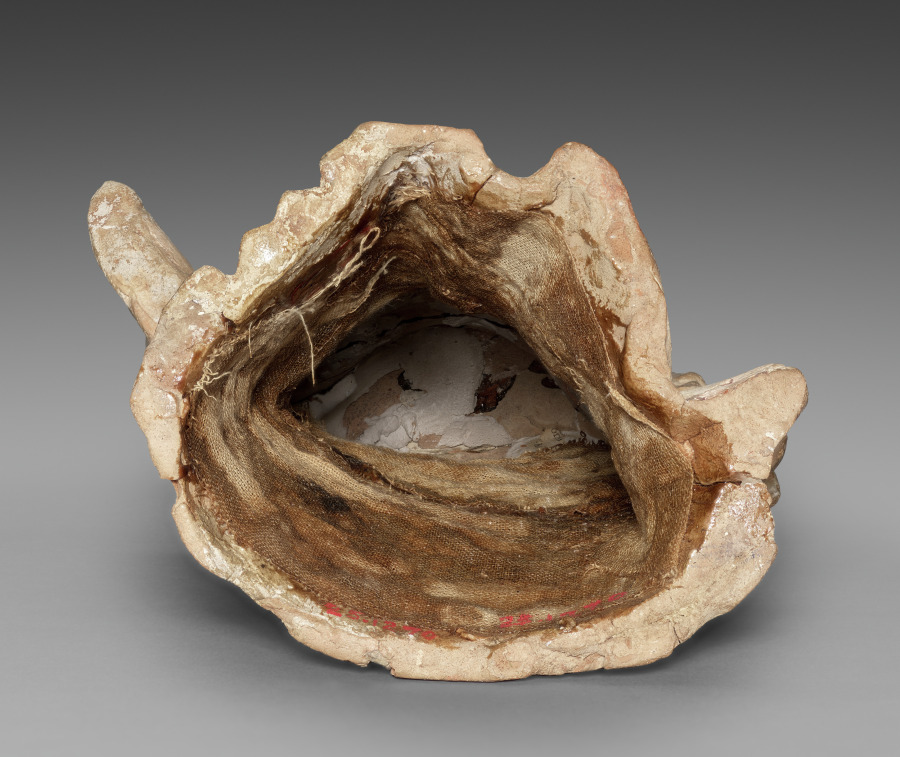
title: Figurine of Standing Woman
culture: Greece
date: 200s BCE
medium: terracotta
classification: Sculpture